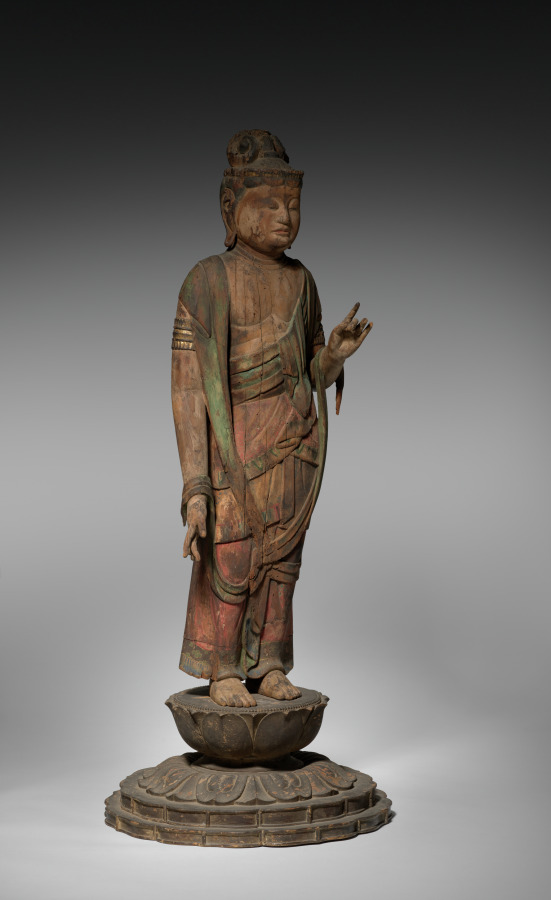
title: Shō Kannon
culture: Japan, Heian period (794–1185)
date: 900s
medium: Wood with traces of color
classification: Sculpture